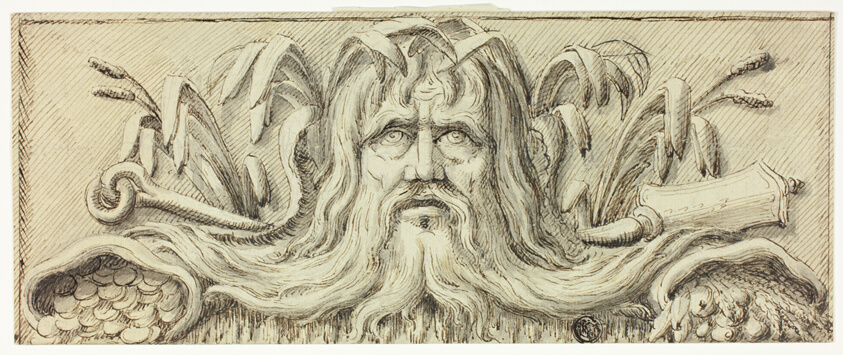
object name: Drawing and Watercolor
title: Head of Neptune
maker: James Barry (Irish, 1741-1806) or circle of; or James Thornhill (English, 1675-1734)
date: 18th century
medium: Pen and brown ink with brush and gray wash and traces of graphite, on ivory laid paper, laid down on cream laid paper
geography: Ireland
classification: pen and ink drawings; drawings (visual works); prints and drawing